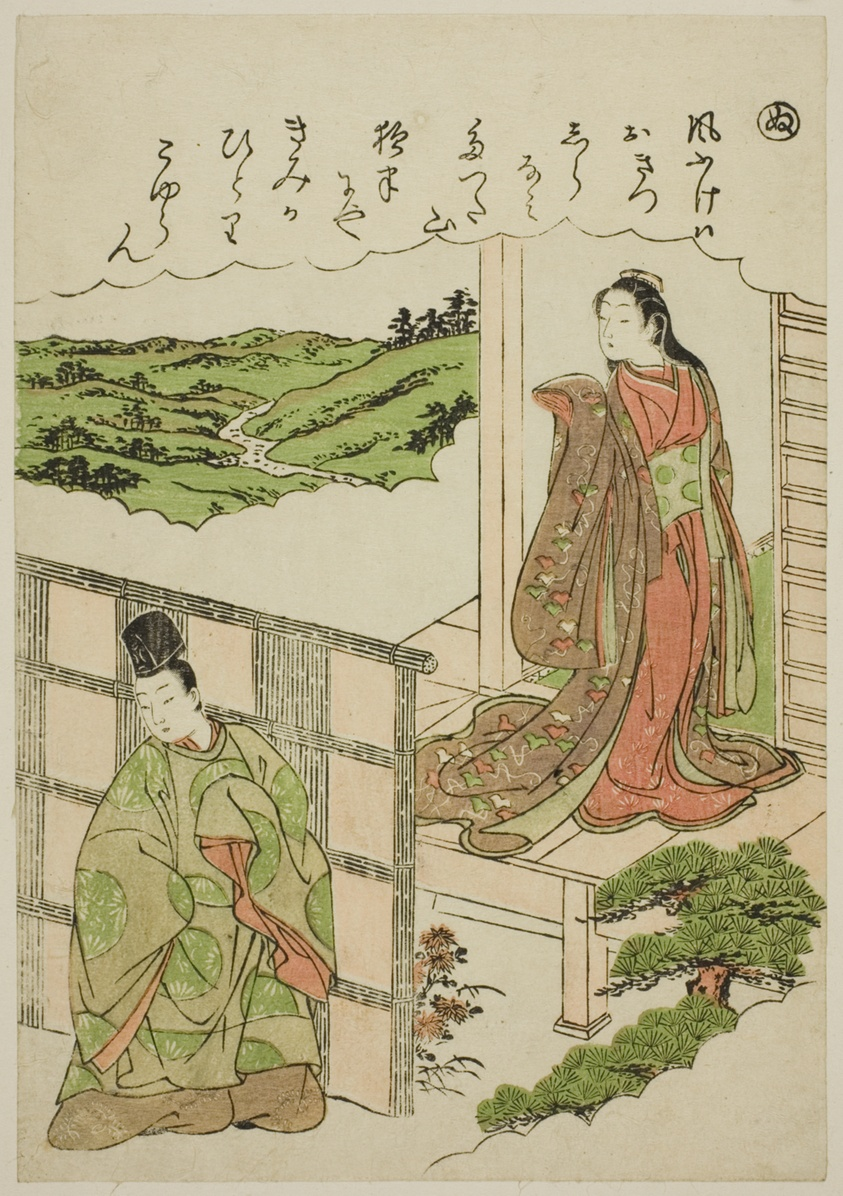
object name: Print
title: "Nu": Crossing Tatsuta, from the series "Tales of Ise in Fashionable Brocade Pictures (Furyu nishiki-e Ise monogatari)"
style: Japanese (culture or style)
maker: Katsukawa Shunsho 勝川 春章; Japanese, 1726-1792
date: c. 1772/73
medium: Color woodblock print; koban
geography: Japan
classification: woodblock print; print; asian art